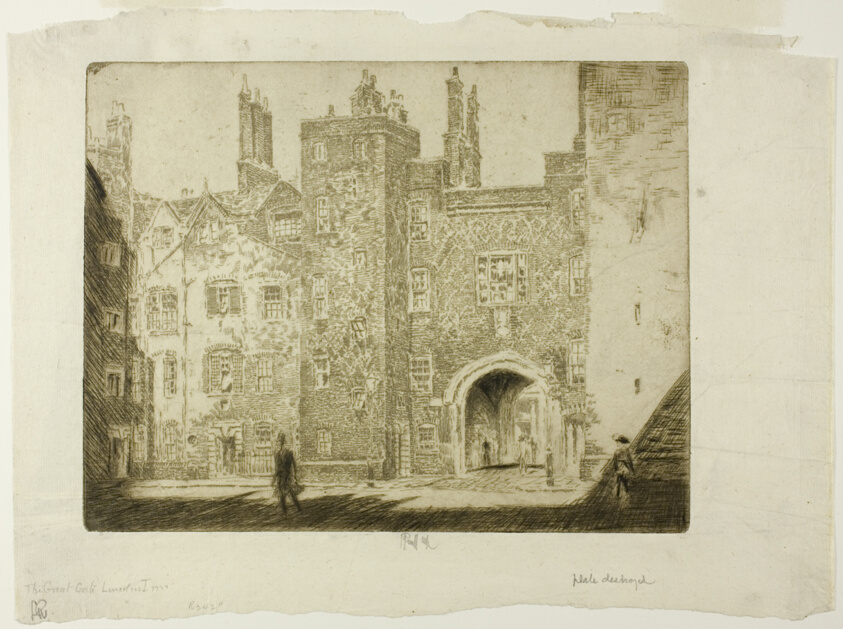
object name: Print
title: The Great Gate, Lincoln's Inn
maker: Joseph Pennell (American, 1857-1926)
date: 1905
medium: Etching on thin off-white laid paper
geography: United States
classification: etching; print; prints and drawing